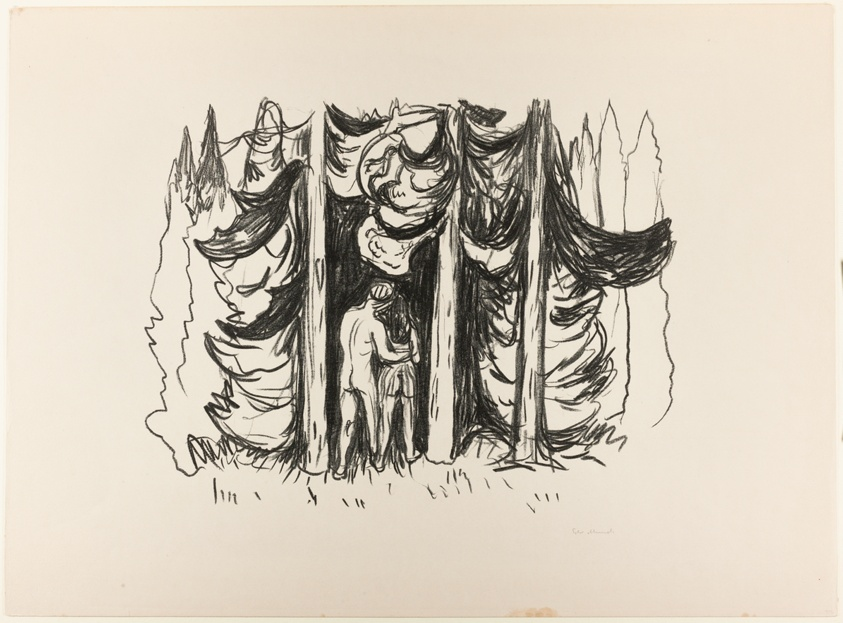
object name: Print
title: The Forest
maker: Edvard Munch (Norwegian, 1863-1944)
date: 1908/09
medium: Lithograph on paper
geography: Norway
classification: lithograph; print; prints and drawing